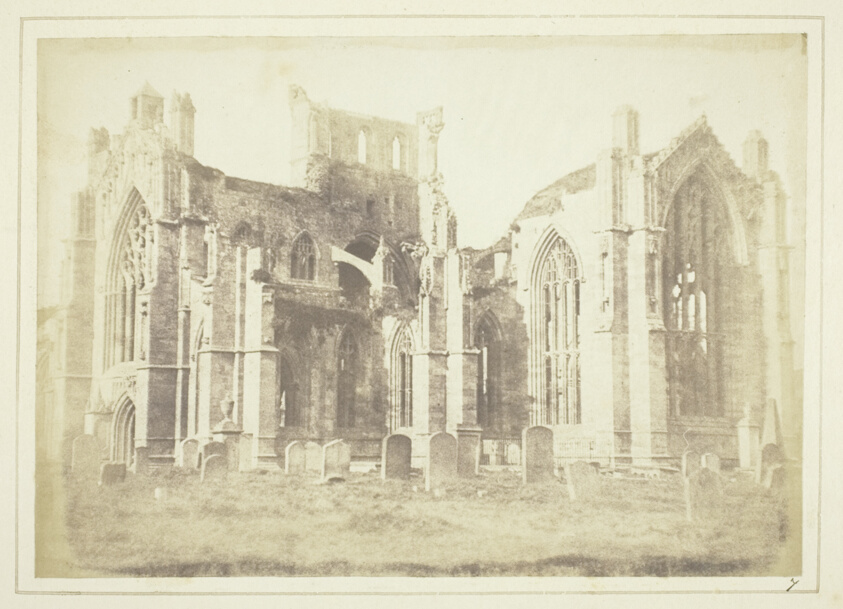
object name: Photograph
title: Melrose Abbey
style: 19th century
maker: William Henry Fox Talbot (English, 1800–1877)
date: 1844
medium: Salted paper print, plate VII from the album "Sun Pictures in Scotland" (1845)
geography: England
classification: salted paper print; photographic process; photography; photograph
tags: Collected by Hugh Edwards